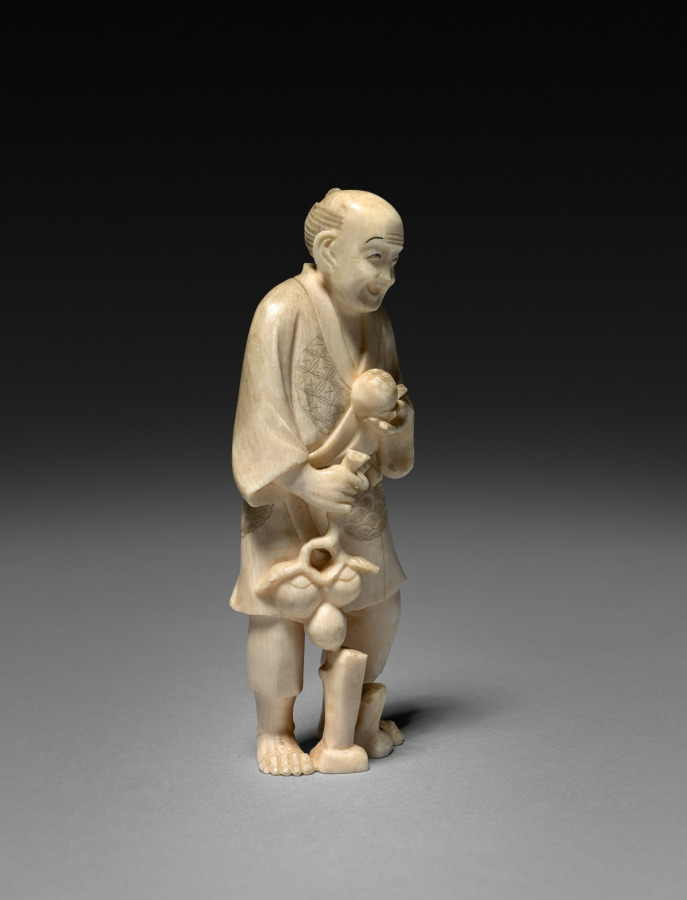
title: Man Holding Fruit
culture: Japan, Meiji period (1868–1912)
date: early 1900s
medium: ivory, pigment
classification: Ivory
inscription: 光江